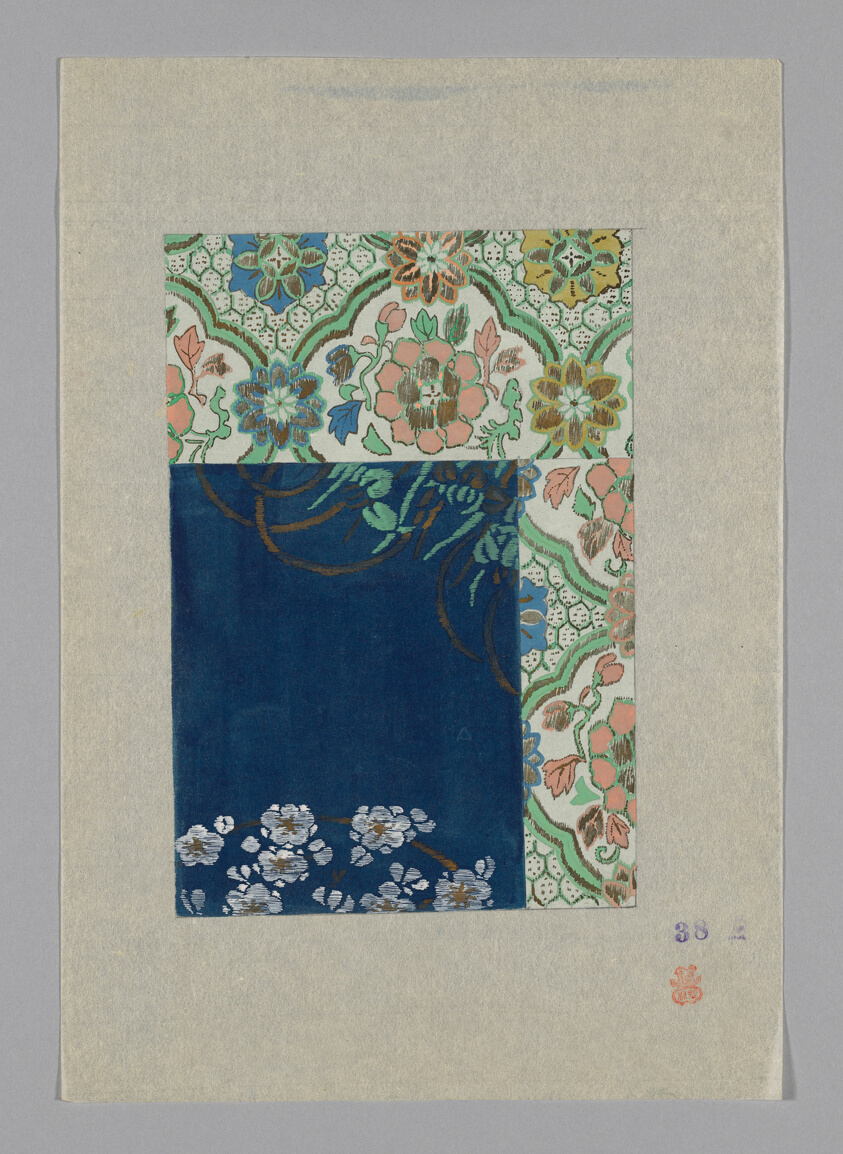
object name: Drawing and Watercolor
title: Design on Paper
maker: Japan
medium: Paper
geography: Japan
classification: textile; accessory - paper design; watercolor; paper